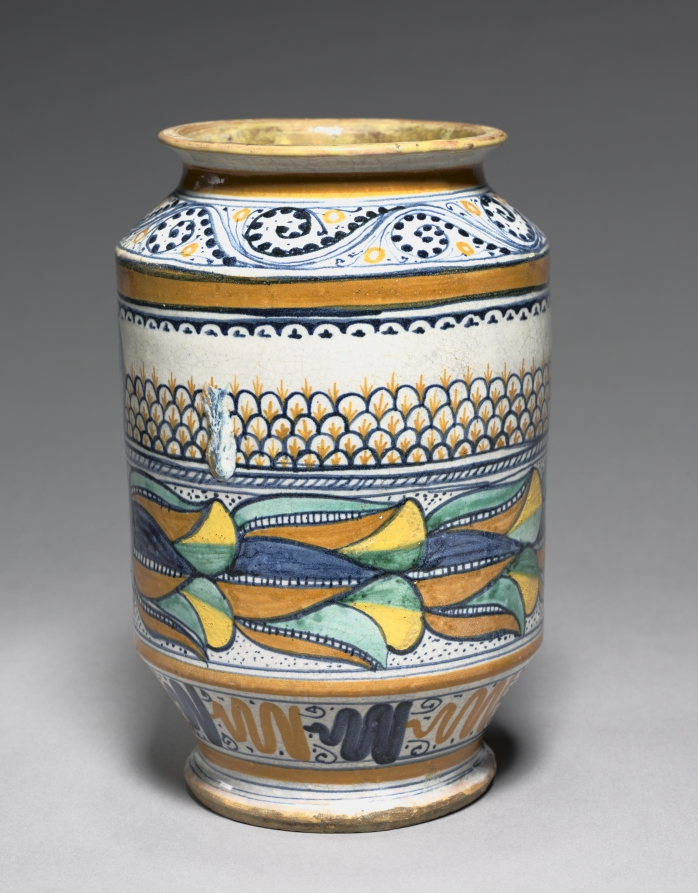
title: Pharmacy Jar (Albarello)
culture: Italy, Siena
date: c. 1510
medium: tin-glazed earthenware (maiolica)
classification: Ceramic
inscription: located above foot of jar: DIA-IRIS.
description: Storage jars that lined the shelves of Renaissance pharmacies often held medicinal herbs, spices, and ointments. Their shape made them easy to grasp while the flared lip allowed apothecaries to seal off the contents with parchment or cloth secured by a string. This particular storage jar depicts a child riding a wild boar.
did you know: The scroll along the bottom reads DIA IRIS, indicating that it may have once held a medicinal iris compound.